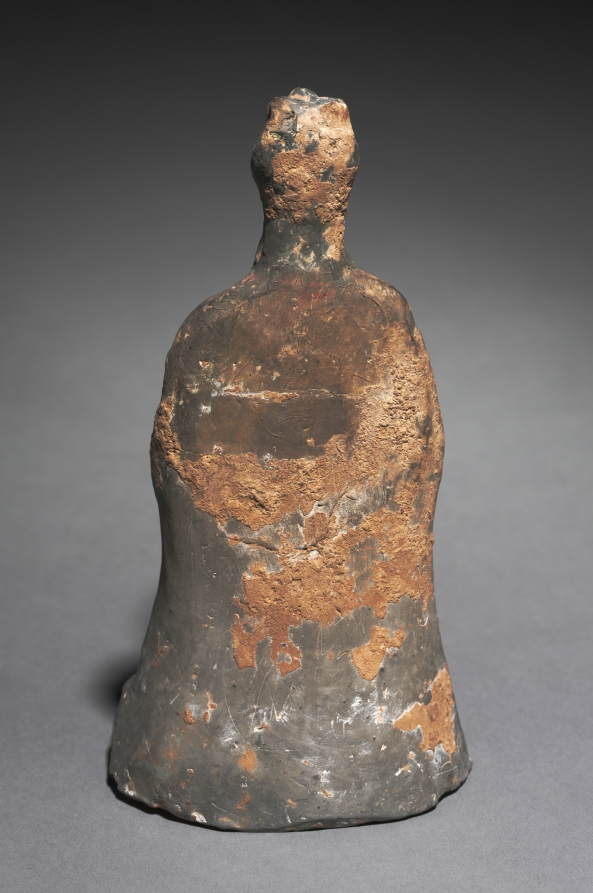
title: Mortuary Figure of the Zodiac Sign: Rat (Aries)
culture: China, Northern Wei dynasty (386-534)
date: 500s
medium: gray earthenware with traces of slip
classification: Sculpture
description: The twelve-animal zodiac series—rat, ox, tiger, rabbit, dragon, snake, horse, goat, monkey, rooster, dog, and boar—signifies a traditional Chinese concept of time structured in a cyclical order. The twelve animals are also linked to the art of fortune-telling that underlies human existence in connection with the changes of the universe. The use of the twelve zodiac animals as tomb furniture suggests they provided a cosmological structure for the afterlife.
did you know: This standing, robed, human figure has its arms crossed and the head of a rat.